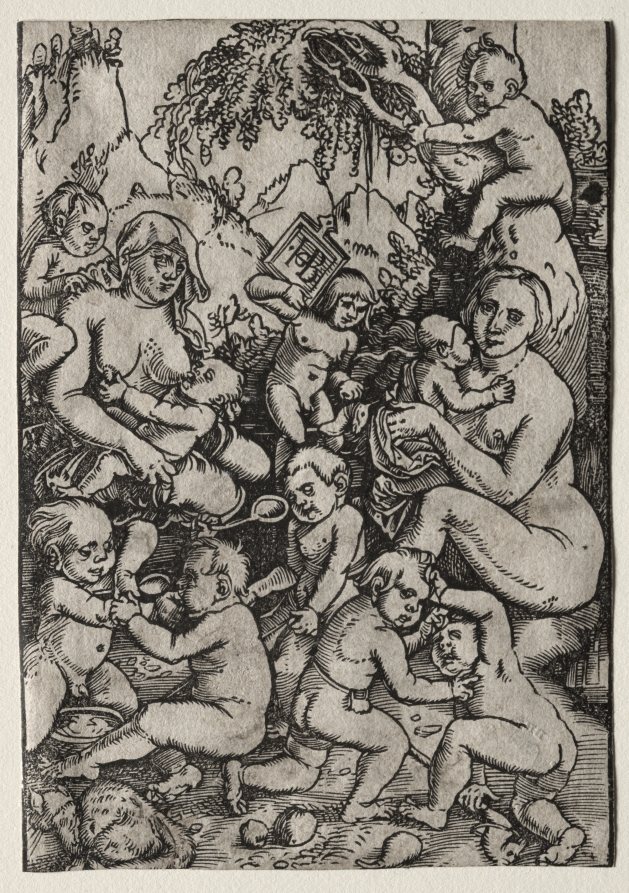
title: The Two Mothers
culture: Germany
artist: Hans Baldung (German, 1484/85–1545)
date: c. 1512–13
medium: woodcut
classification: Print